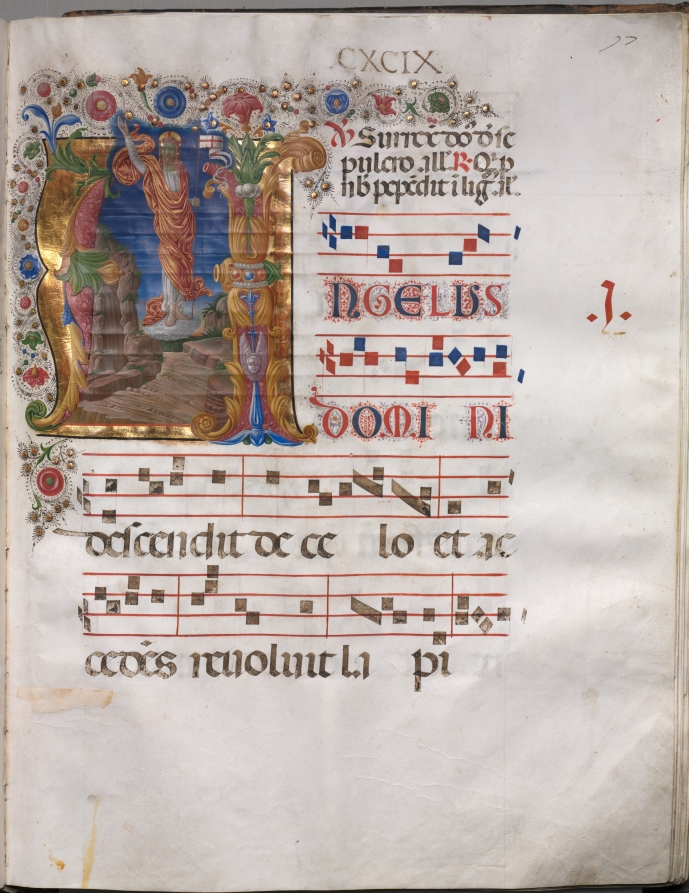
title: Antiphonary: Initial A, Resurrection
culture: Italy, Siena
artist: follower of Girolamo da Cremona (Italian)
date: c. 1470–80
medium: ink, tempera, and gold on parchment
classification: Manuscript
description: The initial A with the resurrected Christ, shown here, was painted by an immediate follower of Girolamo da Cremona, who was likely working in Siena using the master's designs. Girolamo was intermittently active until 1474 in Siena, where he decorated choir books for the cathedral in collaboration with other North Italian illuminators. Antiphonaries like this one were usually made in several volumes for use by a clerical congregation. They were applied to the singing of the Daily Office, the cycle of daily devotions throughout the year. The chant introduced by this initial reads: Angelus Domini descendit de celo... (An angel of the Lord descended...). It is the First Matins Response for Easter.